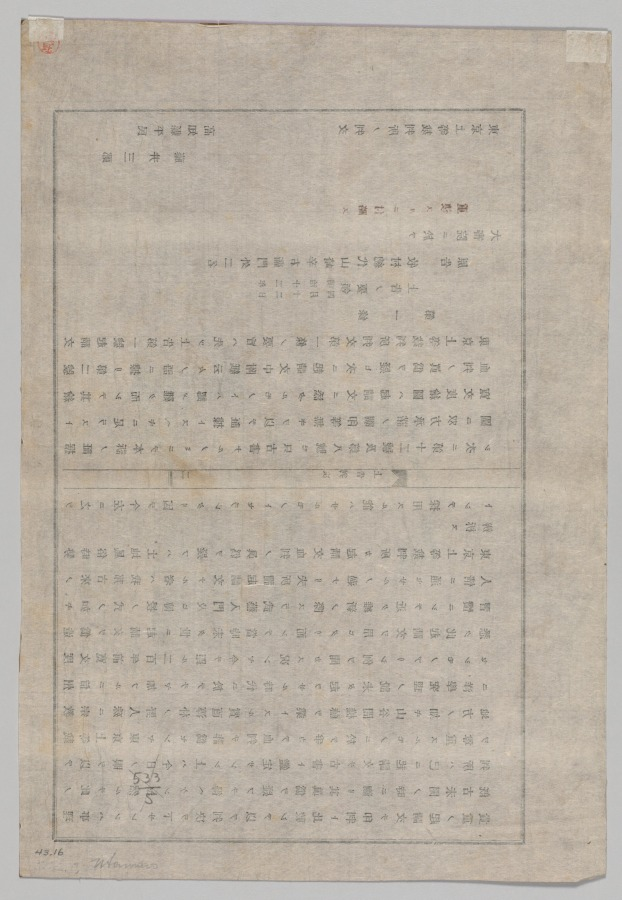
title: Serenade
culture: Japan, Edo period (1615–1868)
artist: Kitagawa Utamaro (Japanese, c. 1754–1806)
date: 1753–1806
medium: color woodblock print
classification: Print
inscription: Signature: Utamaro fude